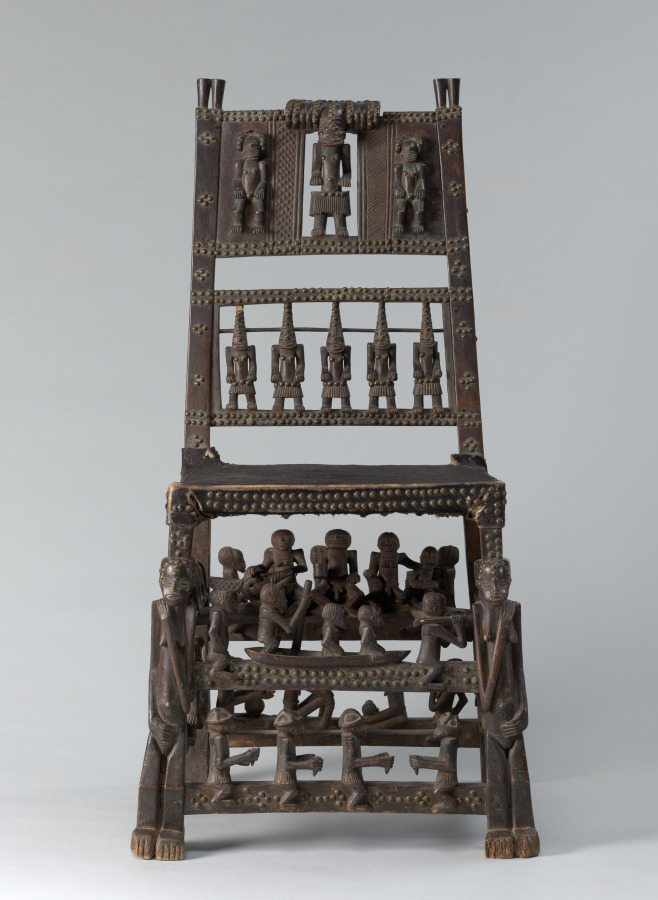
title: Ceremonial Chair or Throne (citwamo ca mangu)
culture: Africa, Central Africa, Angola, Chokwe-style carver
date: 1800s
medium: Wood, upholstery studs, leather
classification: Furniture and woodwork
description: This citwamo ca mangu chair bears over 40 sculpted figures arranged in complex compositions across the chair’s top rail (back), stretchers (rungs), and legs; all symbolize the power of Chokwe supreme chiefs. Such chairs typically bear a dozen or fewer figures. Scenes of royal life and power wrap around the seat, reinforcing how the chief and his family are at the center of their polity and its business.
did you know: Starting around the 1500s, Chokwe and other African leaders and traders received fine chairs as gifts from Portuguese traders. Chokwe leaders adapted this symbol of power as their own, using it in tandem with stools, an earlier kind of prestige seat.